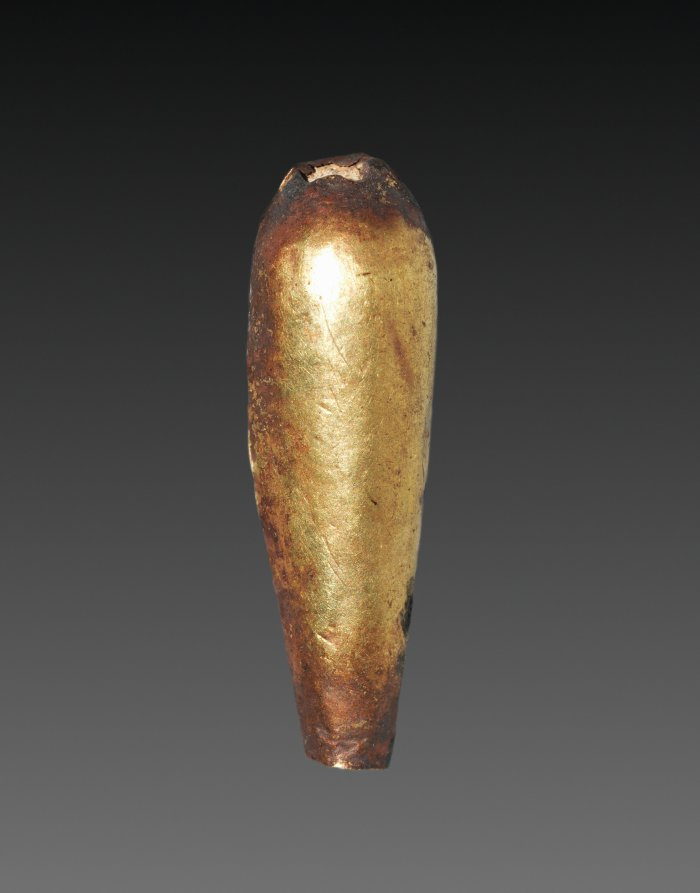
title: Teardrop-Shaped Bead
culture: Egypt, Middle Kingdom (2040–1648 BCE), Dynasty 12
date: 1980–1801 BCE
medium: gold over calcite gesso core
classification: Jewelry